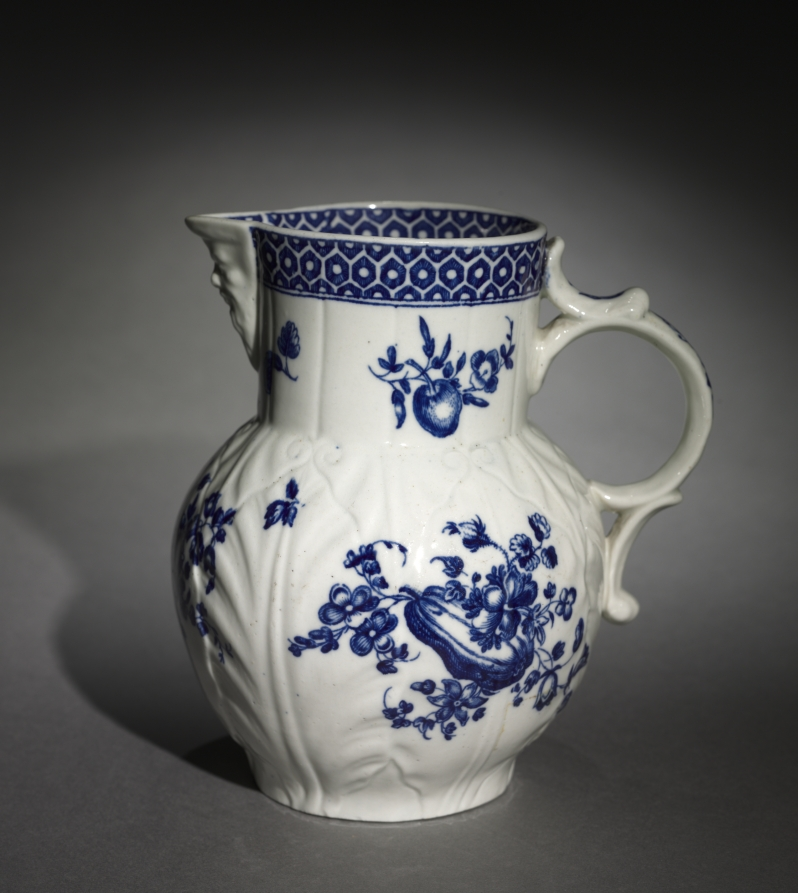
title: Pitcher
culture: England, 18th century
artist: Worcester Porcelain Factory (British, established 1751)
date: c. 1750–70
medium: porcelain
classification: Ceramic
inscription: Half moon mark on the bottom.